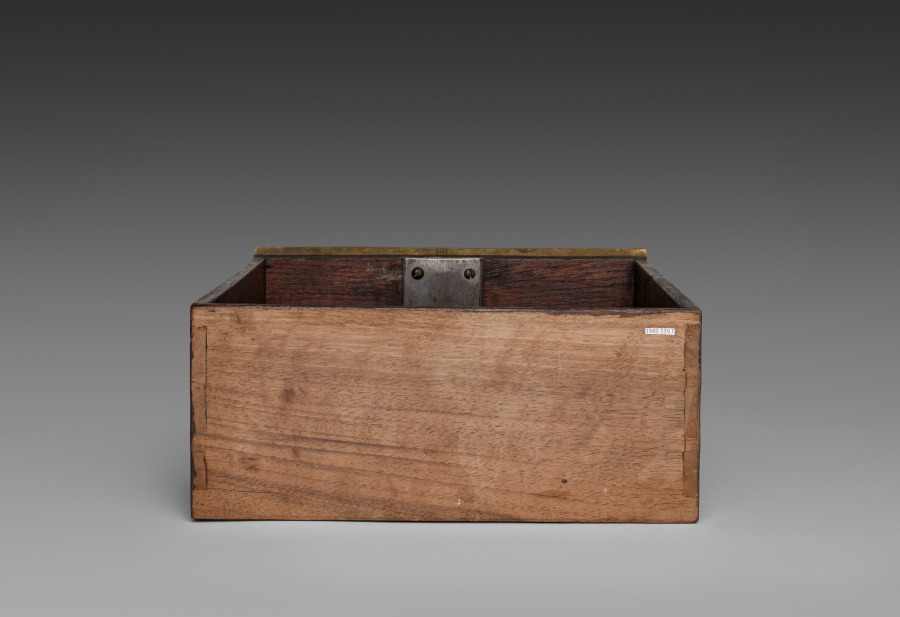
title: Side Drawer for Cabinet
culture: France, late 17th Century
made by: André-Charles Boulle (French, 1642–1732)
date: c. 1690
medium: ebony, marquetry in metal and tortoise shell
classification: Furniture and woodwork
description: Appointed cabinetmaker to King Louis XIV in 1672, André-Charles Boulle became a master of furniture making in France during the late 1600s until his death in 1732. Known primarily for his use of marquetry, in which metal patterns are inlaid into tortoiseshell then applied within the veneered surface of the furniture, Boulle established a level of quality and craftsmanship few others could achieve. As a result, his work found favor at the royal court and among other aristocrats and diplomats eager to impress the king. The inclusion of a medallion depicting Louis XIV within the bronze decoration of this chest would have identified the owner with the royal court. Often exhibiting stout architectural proportions with elegant groups of inlaid motifs such as the parrot on the central panel of this chest, Boulle’s designs are an example of the intellectual fashion for contrasting ideas, materials, and motifs.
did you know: Originally designed to sit atop an elaborate tall stand, this chest was likely altered in the late 1700s to reduce its scale and height.